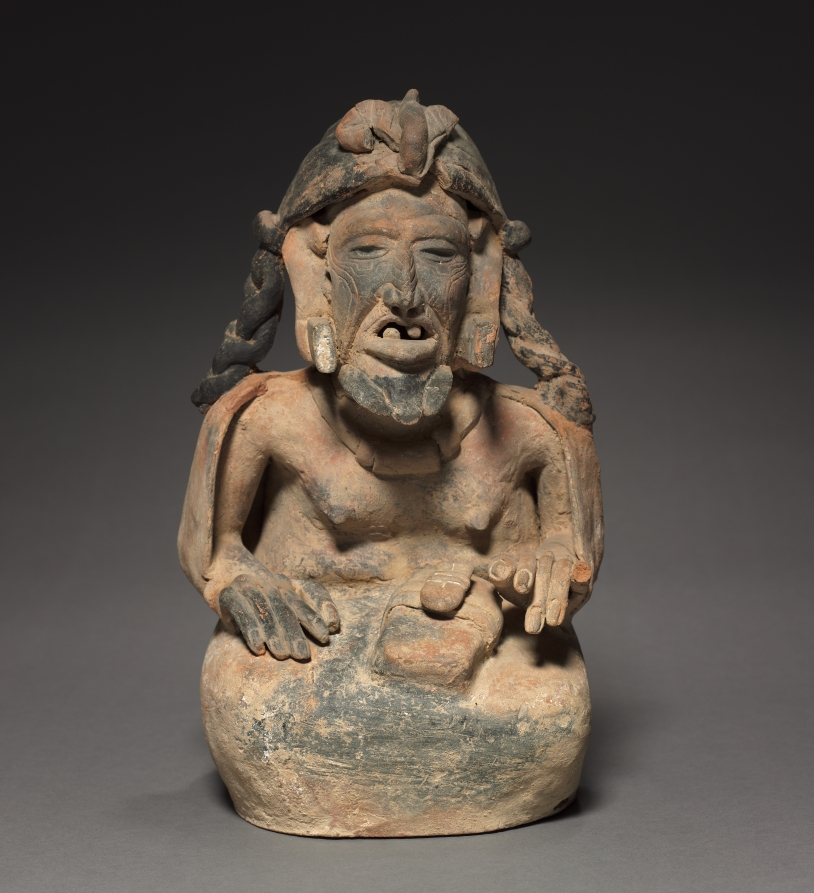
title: Elderly Figure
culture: Mexico, Campeche, Veracruz Monumental Sculpture Type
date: 600–900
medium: molded and modeled pottery with gray, tan and black paint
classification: Sculpture